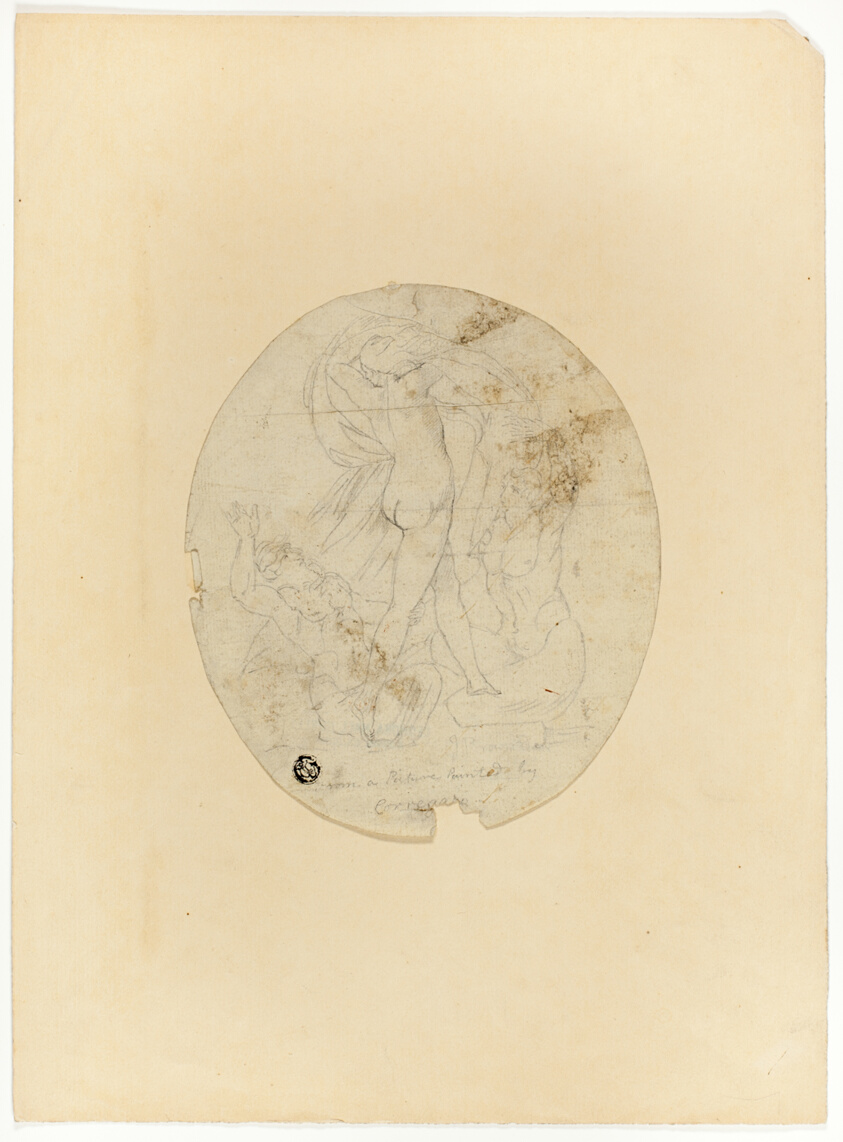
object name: Drawing and Watercolor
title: Three Nude Figures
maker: Possibly by John Brown (Scottish, 1752-1787); after Correggio (Italian, 1489/94-1534)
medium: Graphite on oval-shaped ivory laid paper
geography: United Kingdom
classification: graphite; drawings (visual works); prints and drawing